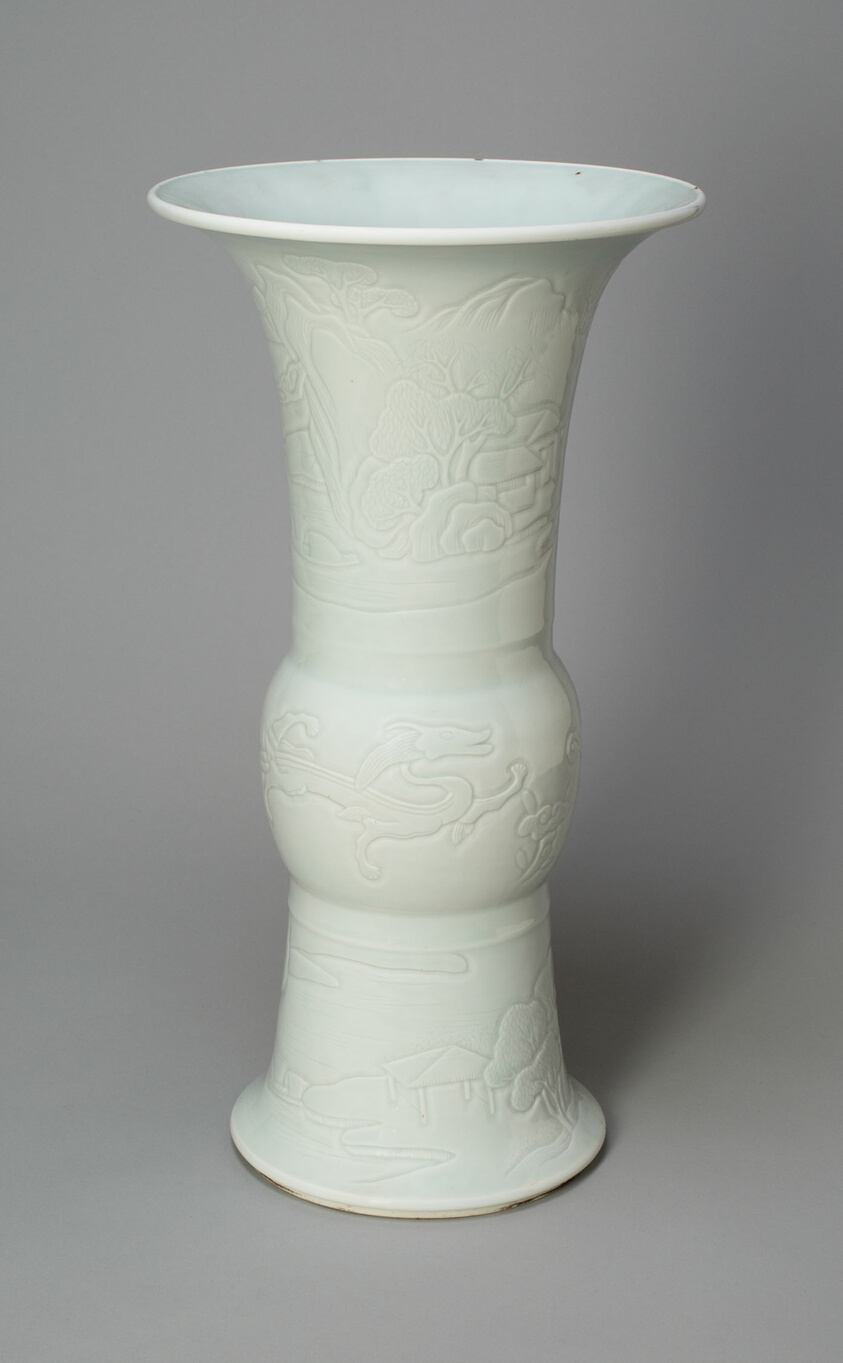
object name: Vessel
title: Zun-Shaped Vase with Dragons and Landscapes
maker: China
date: Qing dynasty (1644–1911), Kangxi period (1662–1722)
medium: Porcelain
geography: China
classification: porcelain; asian art; ceramics